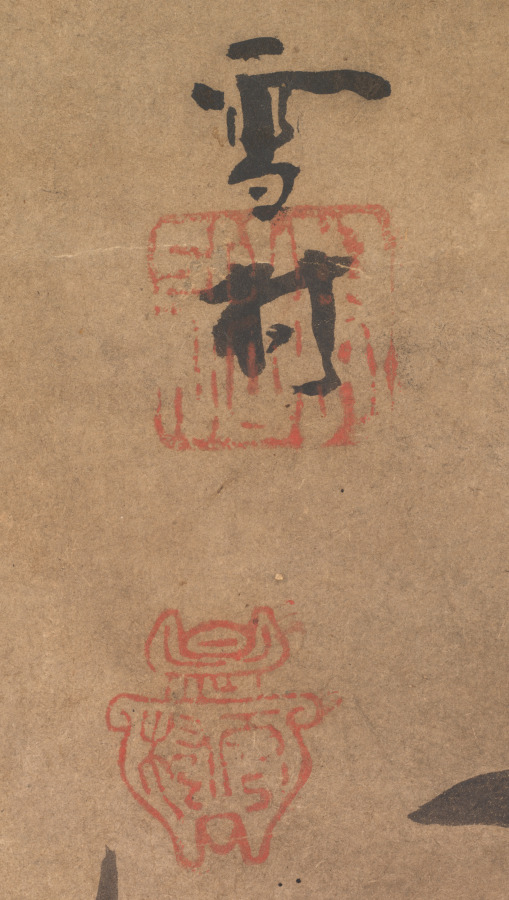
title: Bamboo and Plum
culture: Japan, Muromachi period (1392–1573)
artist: Sesson Shūkei (Japanese, active 1504-c. 1589)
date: 1500s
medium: hanging scroll; ink on paper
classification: Painting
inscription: signed: "Sesson"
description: This painting of a white plum (or prunus) and bamboo was once part of a triptych. A central image of the demon-queller Zhong Kui was flanked by this painting and one of a red plum and bamboo. The paintings would have been suitable to hang after the turn of the new year, when Zhong Kui would drive out evil demons, and the year’s first flowers were in bloom. Sesson hailed from what is now Ibaraki prefecture in northern Honshu. A Zen monk, he spent much of his career in the Kanto region, and developed a distinctive style uninhibited by formal training in the Kano atelier.